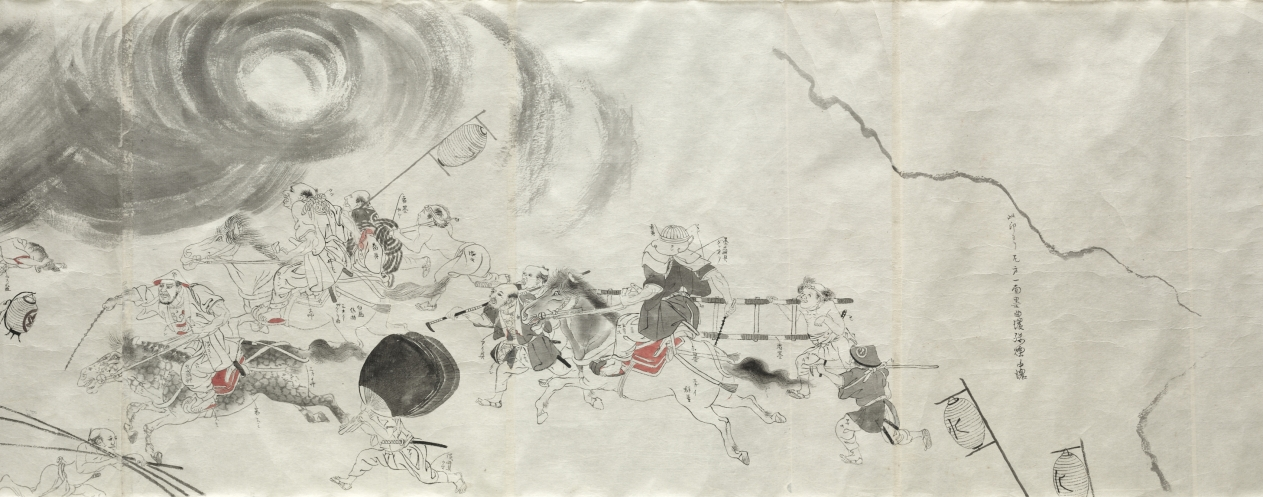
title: Sketch Copy of Natural Disasters, from the Seven Fortunes and Misfortunes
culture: Japan, Edo period (1615–1868) to Meiji period (1868–1912)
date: after 1773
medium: handscroll; ink and color on paper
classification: Painting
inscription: Signed: Gettcho; dated 1773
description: This unmounted handscroll is a copy of the first of a three-scroll set painted by Maruyama Ōkyo (1733–1795) for Buddhist monk Yujō (1723–1773). It depicts people's unfortunate encounters with forces of nature from wind to beasts. Ōkyo's realistic, contemporary imagery was meant to evoke a sense of recognition and empathy in viewers, shocking them into avoidance of possible punishments.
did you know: Notations that appear throughout the scroll indicate colors and other details of the original painting.